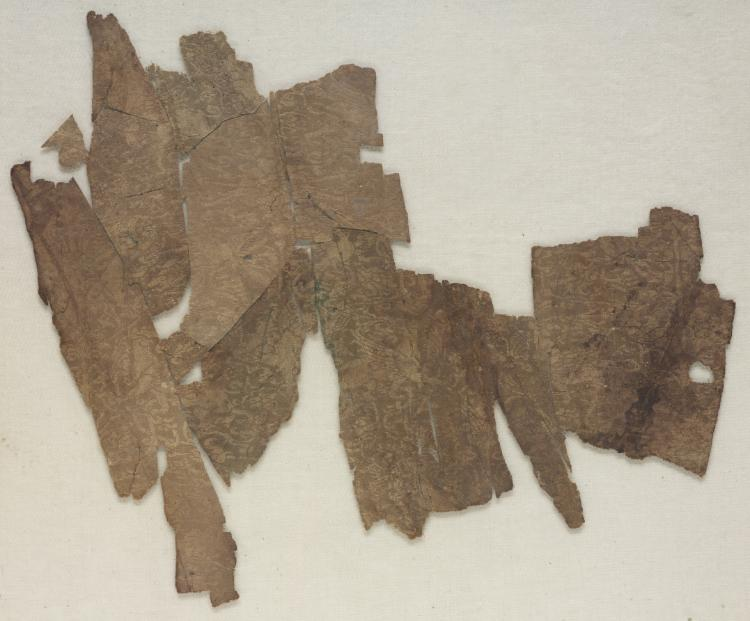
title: Fragment (Reconstructed from a Number of Smaller Fragments)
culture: Egypt, Ayyubid Period, 12th century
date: 1100s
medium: tabby with supplementary weft; silk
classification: Textile